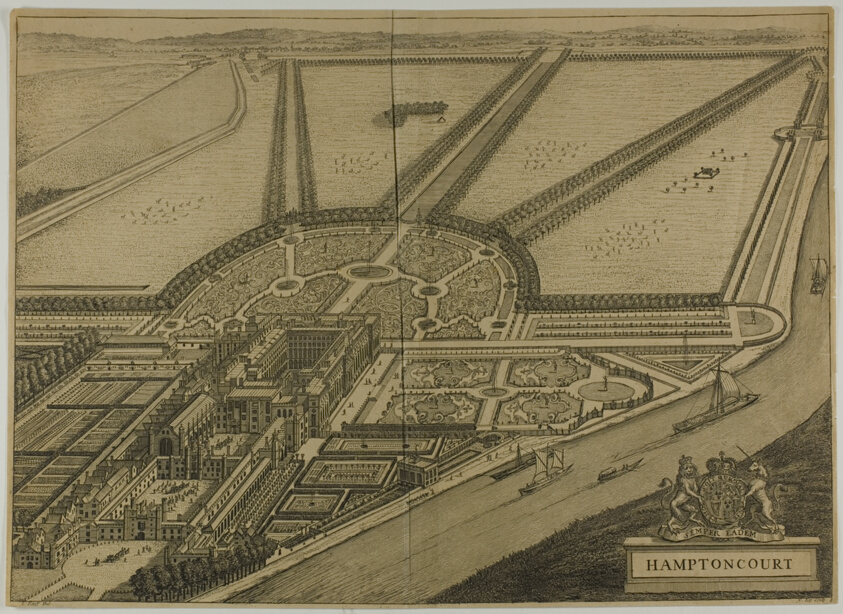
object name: Print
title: Hampton Court, plate six from Britannia Illustrata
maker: Jan Kip (Dutch, c. 1653-1722); after Leonard Knyff (Dutch, 1650-1721); published by David Mortier (French, 1673-1728)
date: published 1707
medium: Etching, with engraving, in black on tan laid paper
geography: Netherlands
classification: prints and drawing; engraving; etching; print